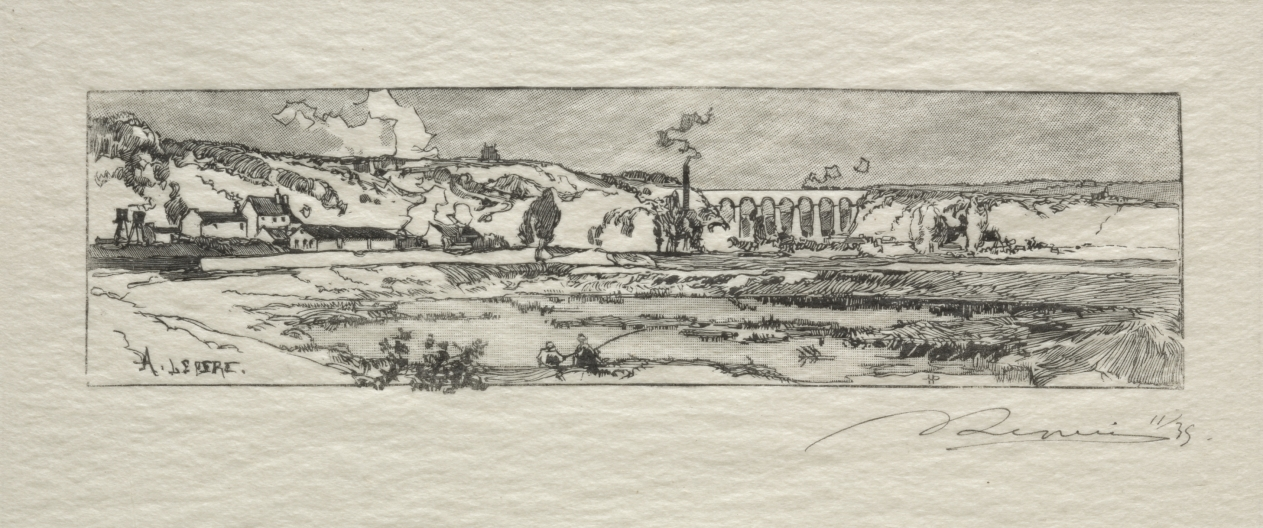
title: Etang d'Issy les Moulineaux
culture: France, 19th-20th century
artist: Auguste Louis Lepère (French, 1849–1918)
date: c. 1870–1918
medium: wood engraving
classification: Print